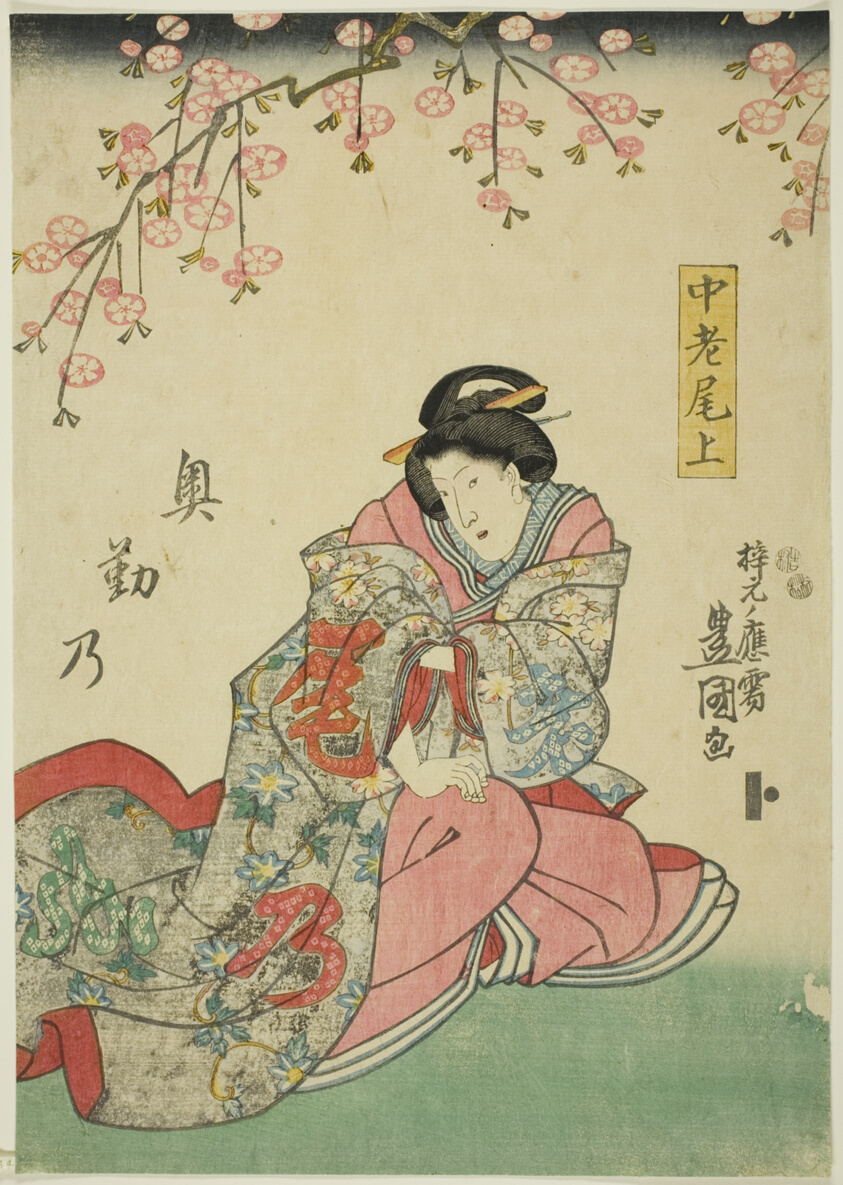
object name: Print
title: The actor Ichimura Uzaemon XII as Churo Onoe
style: Japanese (culture or style)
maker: Utagawa Kunisada I (Toyokuni III) (Japanese, 1786-1864)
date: 1847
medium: Color woodblock print; center sheet of oban triptych (right: 1939.1034b)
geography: Japan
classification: print; asian art